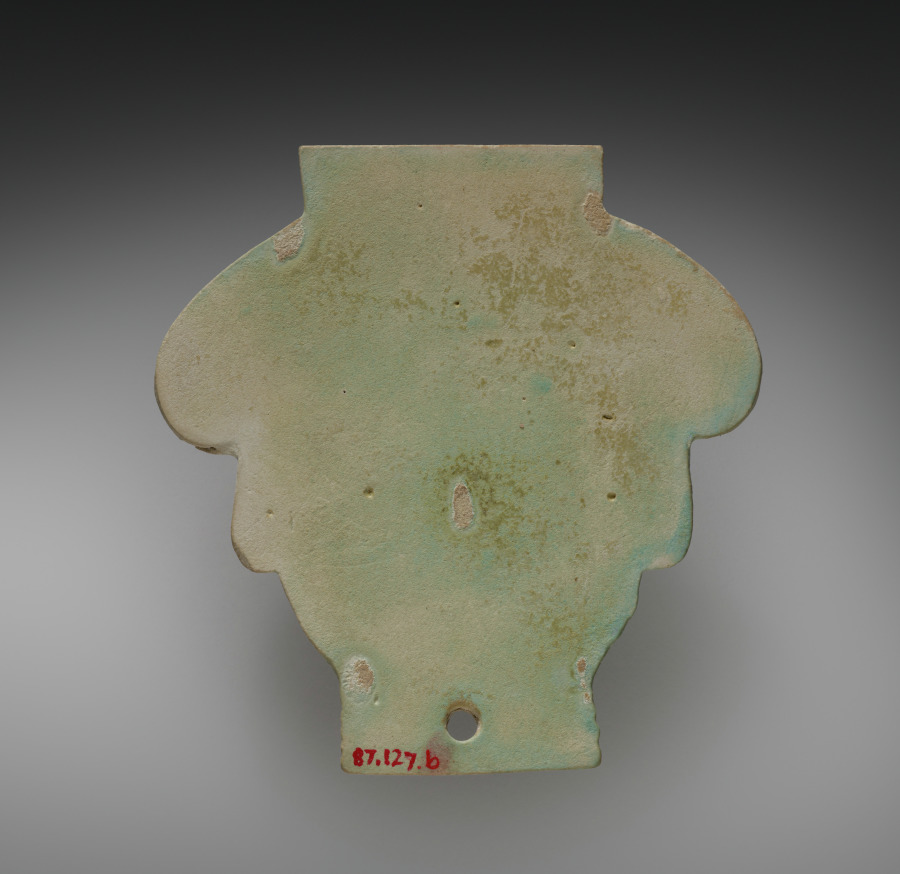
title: Box (Pyxis) in the Form of a Composite Capital (lid)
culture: Egypt, Greco-Roman period (332 BCE–395 CE), Ptolemaic dynasty (305–30 BCE)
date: 305–30 BCE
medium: pale robin's-egg blue faience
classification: Vessels